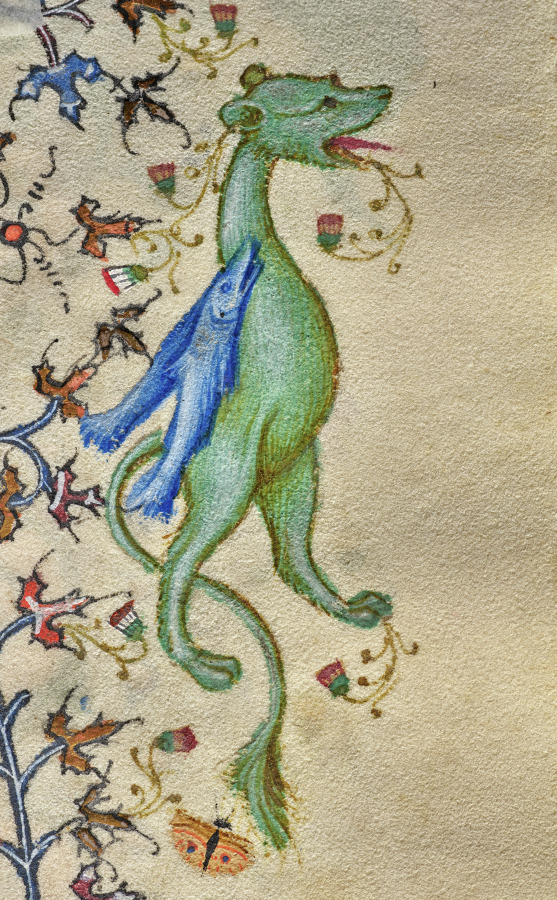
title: Hours of Charles the Noble, King of Navarre (1361-1425): fol. 284r, Text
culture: France, Paris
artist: Master of the Brussels Initials and Associates (French)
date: c. 1405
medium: ink, tempera, and gold on vellum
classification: Bound Volume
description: This precious volume was obviously highly prized by its owner, the French-born King of Navarre, who had his coat of arms painted on no less than twenty folios. Rather than directly commissioning this manuscript from a specific workshop, it seems that Charles the Noble acquired his book of hours -- perhaps ready-made for the luxury market -- while on a trip to Paris in 1404-05. A collaborative effort, six painting styles are evidenced within the pages of this codex, those of two Italians, two Frenchmen, and two Netherlanders. The painter who was responsible for the planning and decoration of the book, and who produced seventeen of the large miniatures, was a Bolognese artist known as the Master of the Brussels Initials. His principal assistant, responsible for most of the borders, was a Florentine who signed his name "Zecho" da Firenze on folio 208 verso.